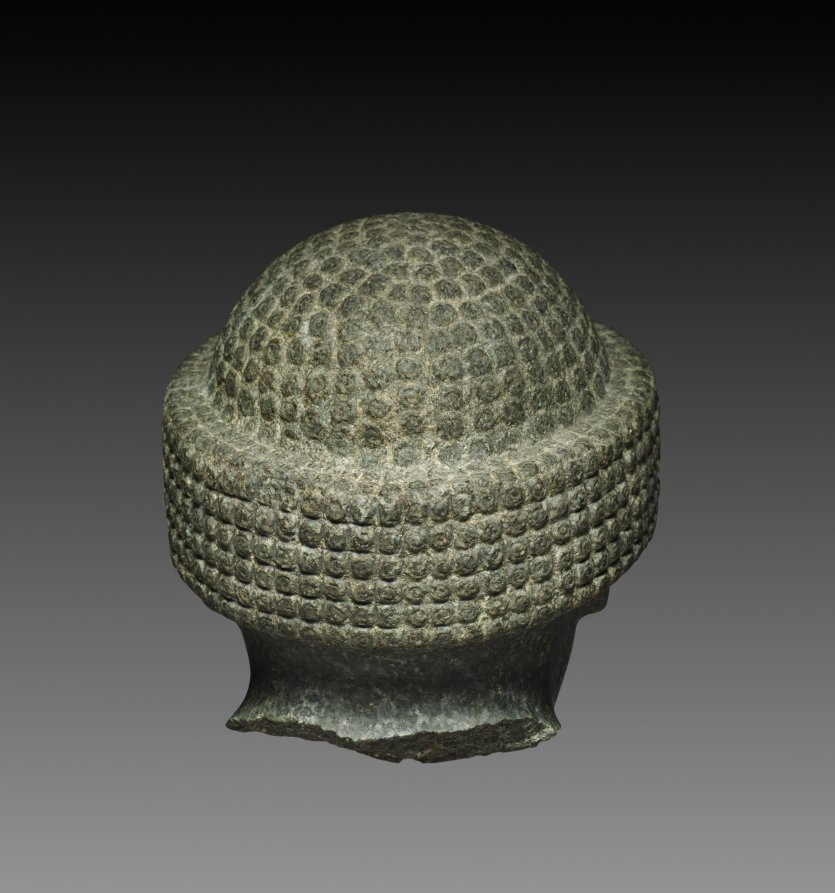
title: Head of Gudea, ensi of Lagash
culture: Mesopotamia, Iraq, Lagash (Tello)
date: 2144–2124 BCE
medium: dolerite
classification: Sculpture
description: Gudea was an ensi or ruler of the southern Mesopotamian city-state of Lagash in the 22nd century BCE. Archaeologists have found over 30 complete and fragmentary statues of his likeness and over 2,400 inscriptions mentioning his name. Gudea was both a political and religious leader, and most of the statues depicting him were housed in temples.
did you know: This head was originally on the body of 1963.154; however, they were separated in 1974 when it was realized they did not belong together.